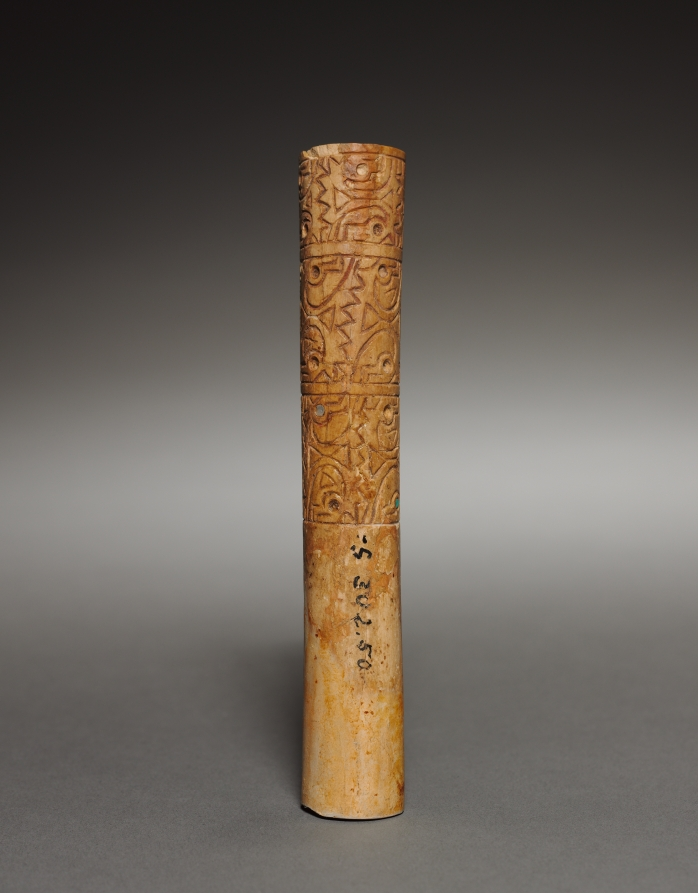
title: Ear Ornament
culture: Peru, Moche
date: 200–550 CE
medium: incised bone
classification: Jewelry